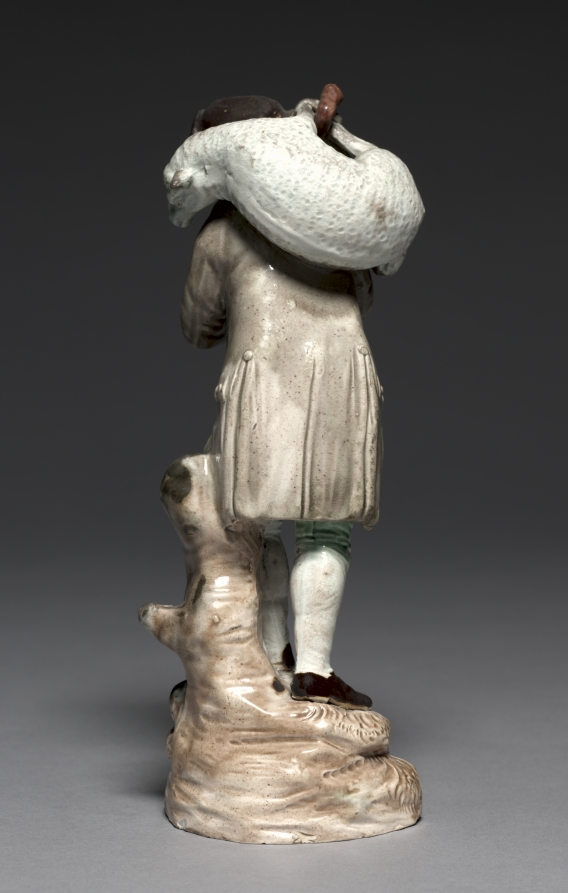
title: The Lost Sheep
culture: England, Staffordshire, 18th century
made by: Staffordshire Factory (British)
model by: John Voyez (French)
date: c. 1770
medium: lead glazed earthenware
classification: Ceramic